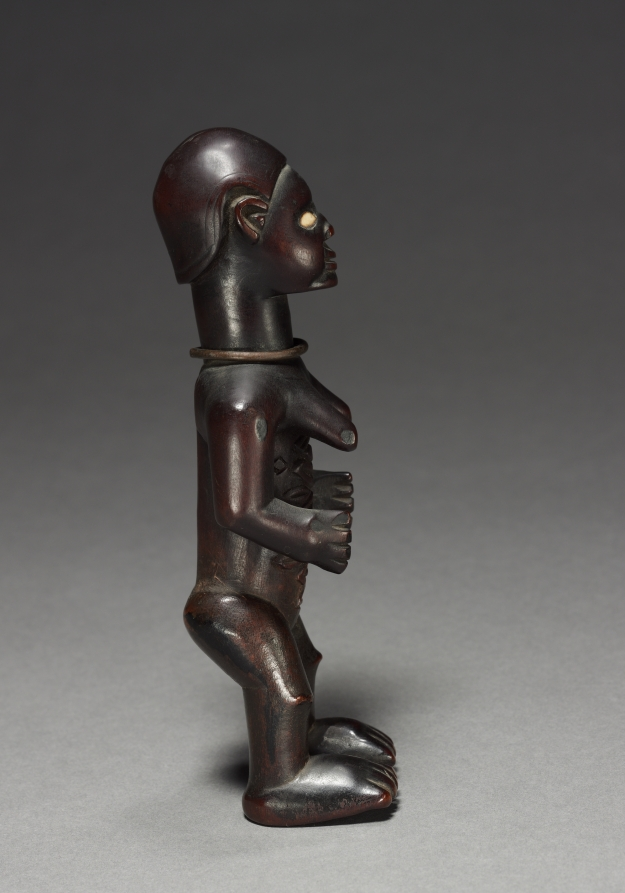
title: Female Figurine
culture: Africa, Central Africa, Republic of the Congo, Beembe-style maker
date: late 1800s-early 1900s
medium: Wood, possibly ceramic, and copper alloy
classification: Sculpture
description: Beembe figurines generally have greatly detailed anatomical and decorative features. The scarification among Beembe men and women communicated their ideas about local beauty and ethnic belonging. These figures are charged with an ancestor’s spirit through a mixture of resin and human-derived ingredients—taken from the corpse of the person they possibly portray—into a small cavity near the rectum.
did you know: The carvings in the figure’s abdomen reflect the custom of body scarification among the Beembe people.